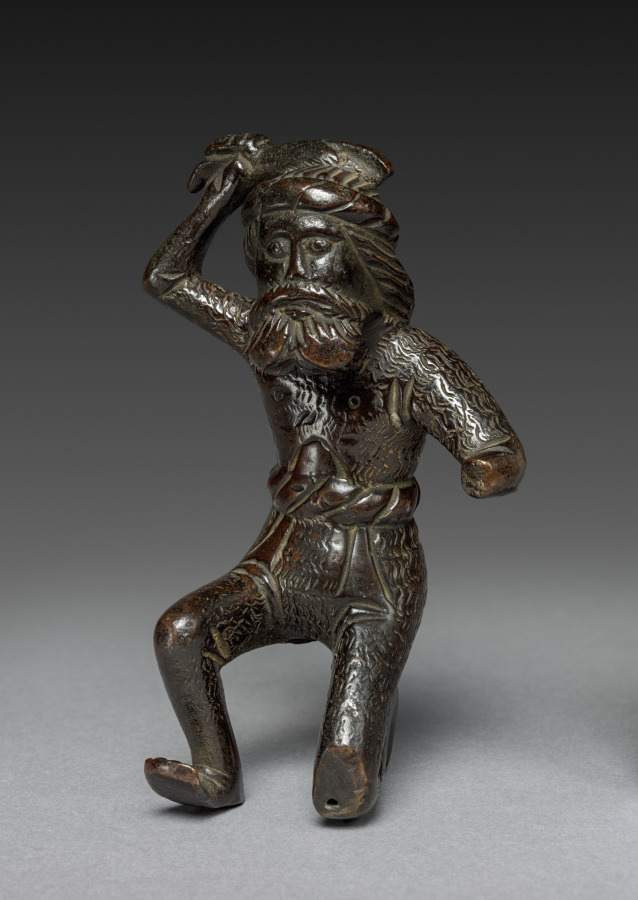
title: Wild Man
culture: Germany, Nuremberg(?)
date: late 1400s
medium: copper alloy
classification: Sculpture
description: Common in medieval art, the wild man is humanlike in appearance with long shaggy hair over his entire body and typically carries a club. Living at the fringe of society in woodland areas, wild men symbolized man in his natural, uncivilized state. Perhaps derived from the part-man part-beast satyr of antiquity, the wild man symbolized lust and aggression in contrast to the spiritual love embodied in medieval chivalry. This bearded version is shown kneeling while raising his right arm holding a club. He wears a twisted cloth circlet on his head and a similar belt at the waist. It has been suggested that this sculpture originally formed part of a suspended candelabra. It may also have served as support for large metal vessels.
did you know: The wild man is derived from the Greek satyr who lived in the woods.